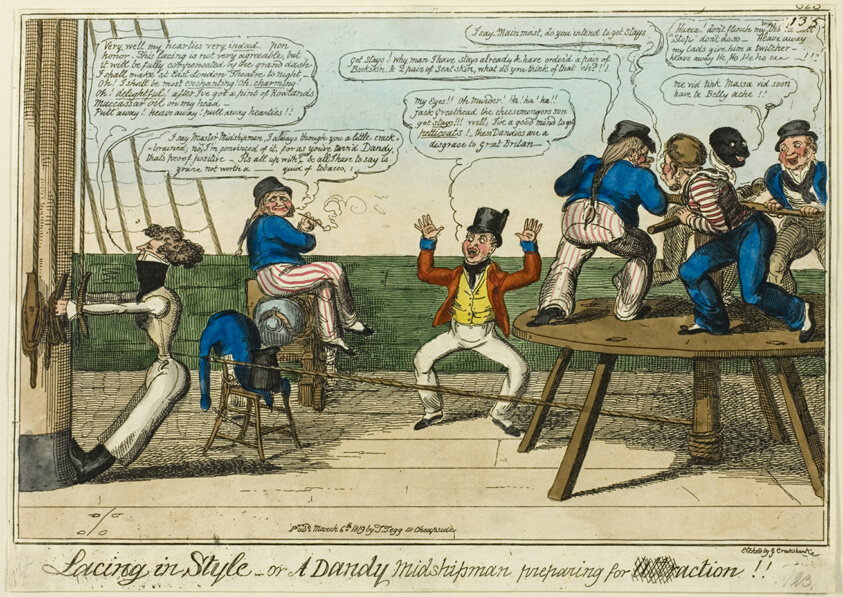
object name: Print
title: Lacing in Style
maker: George Cruikshank (English, 1792-1878); after Captain Frederick Marryat (English, 1792-1848)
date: published March 6, 1819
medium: Hand-colored etching on paper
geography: England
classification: etching; print; prints and drawing